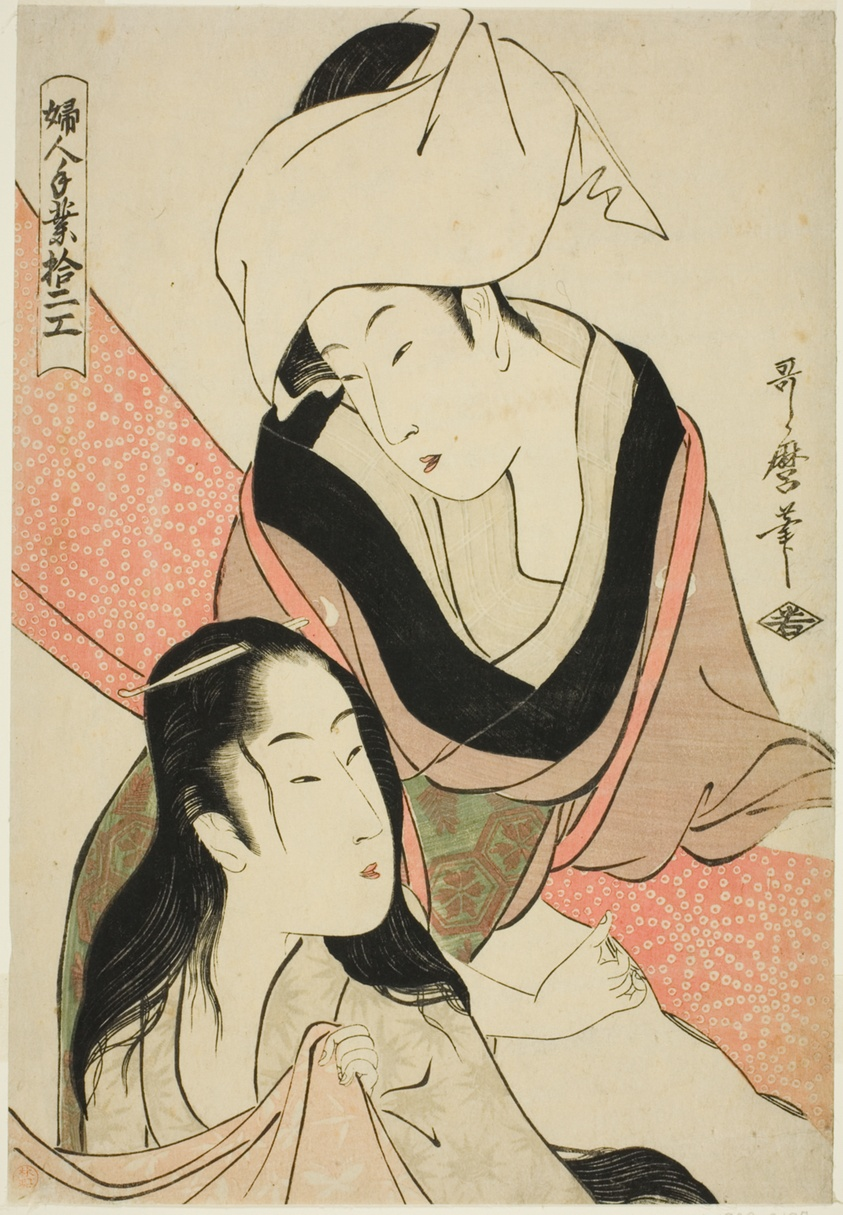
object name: Print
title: Cloth-Strecher, from the series "Twelve Types of Women's Handicraft (Fujin tewaza juni ko)"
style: Japanese (culture or style)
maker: Kitagawa Utamaro 喜多川 歌麿; Japanese, 1753 (?)-1806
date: c. 1798/99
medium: Color woodblock print; oban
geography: Japan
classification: woodblock print; print; asian art